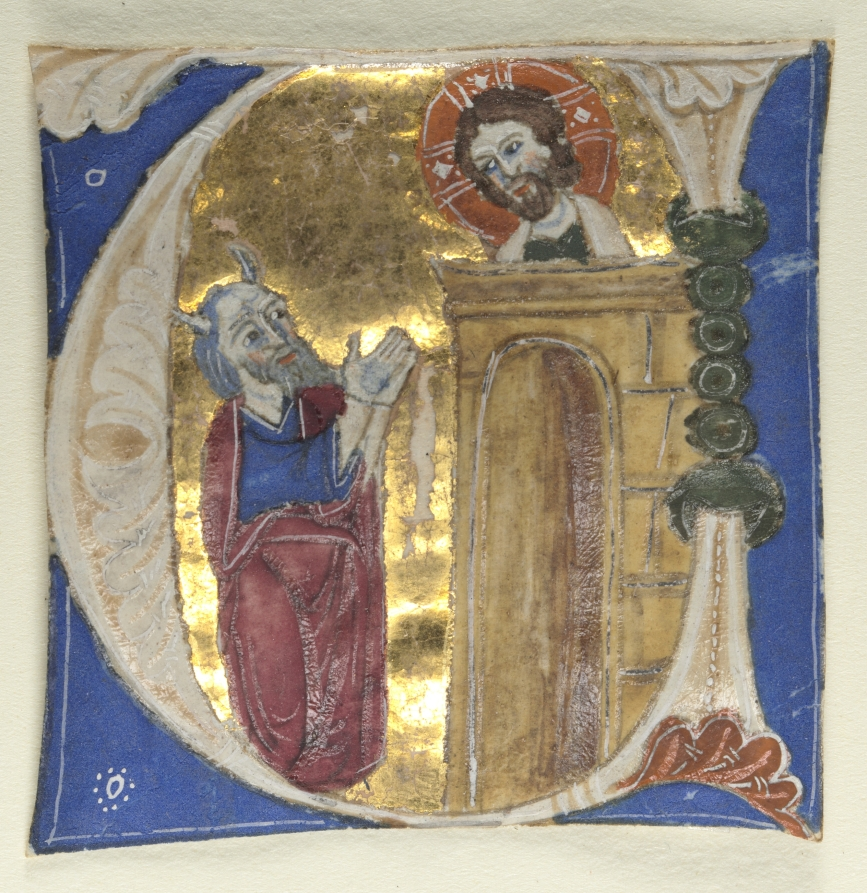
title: Historiated Initial (U) Excised from a Bible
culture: Italy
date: 1200s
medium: tempera and gold on parchment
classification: Manuscript